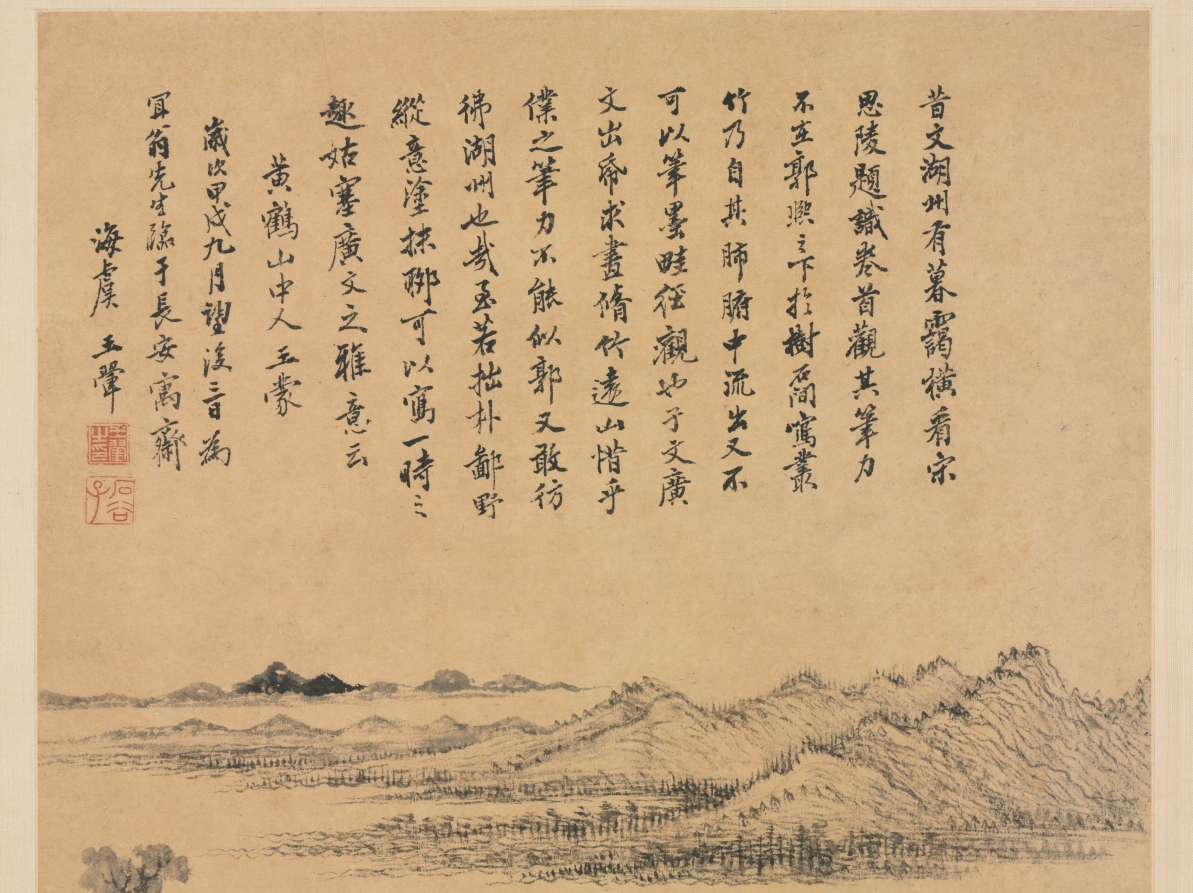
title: Tall Bamboo and Distant Mountains, after Wang Meng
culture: China, Qing dynasty (1644-1911)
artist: Wang Hui (Chinese, 1632–1717)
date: 1694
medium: Hanging scroll; ink on paper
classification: Painting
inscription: 昔文湖州有暮靄橫看。宋思陵題識卷首：觀其筆力不在郭煕之下。於樹石間寫叢竹，乃自其肺腑中流出，又不可以筆墨畦徑觀也。 子文廣文出紙求畫修竹遠山。惜乎僕之筆力，不能似郭。又敢彷彿湖州也哉？至若拙朴鄙野，縱意塗抹，聊可以寫一時之趣。姑塞廣文之雅意云。黃鶴山中人王蒙書。 歲次甲戌九月望後三日為冝翁先生臨于長安寓齋。海虞, 王翬。[印]王翬之印; 石谷子.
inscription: 3 additional seals: 1 of Pang Yuanji 龐元濟 (1864–1949); 2 unidentified.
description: Wang Hui studied paintings by earlier masters and digested their styles with unceasing virtuosity. He had such enduring affection for a landscape by Wang Meng 王蒙 (about 1308–85) that between 1686 and 1712, he made several copies, like this example. One of his compositional transformations here was moving the scholar from the pavilion directly into the landscape by the stream. His faithful copying also included inscriptions. Wang Meng had written that he was trying to resuscitate the style of an earlier artist, Wen Tong (1018–1079); therefore, Wang Hui sought to revive both Wang Meng and Wen Tong.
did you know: As a leading figure in the Orthodox School of Chinese painting, Wang Hui believed that the act of painting was a dialogue with one or more masters of the past.